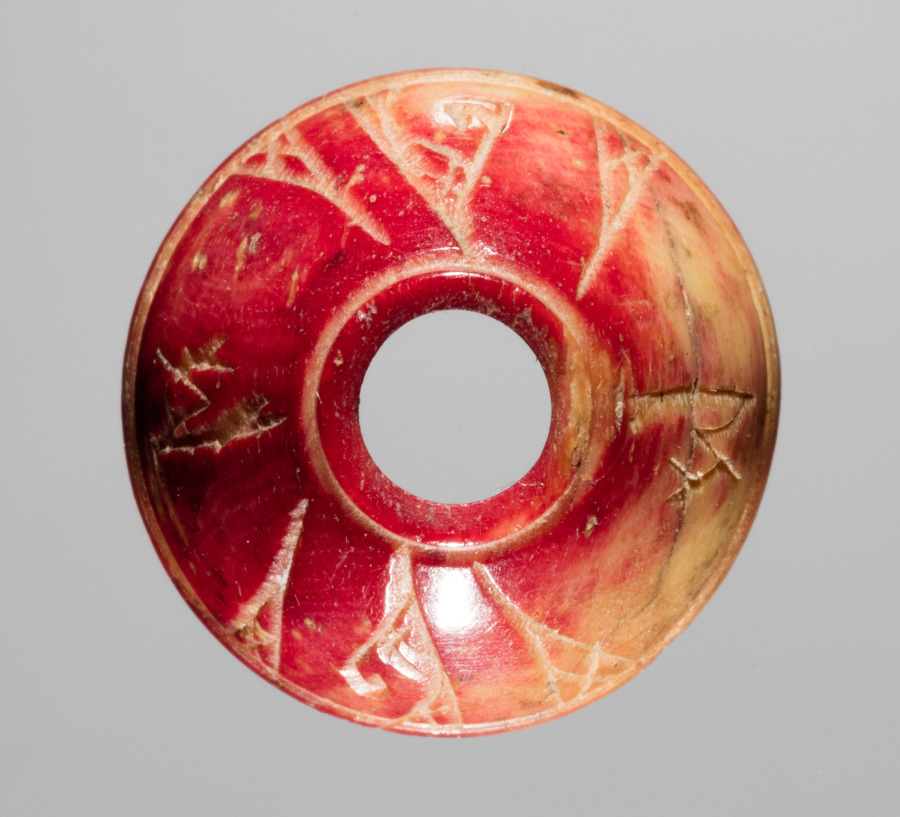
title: Spindle Whorl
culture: Iran, early Islamic period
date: 700s - 900s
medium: bone, incised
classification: Spindle Whorl